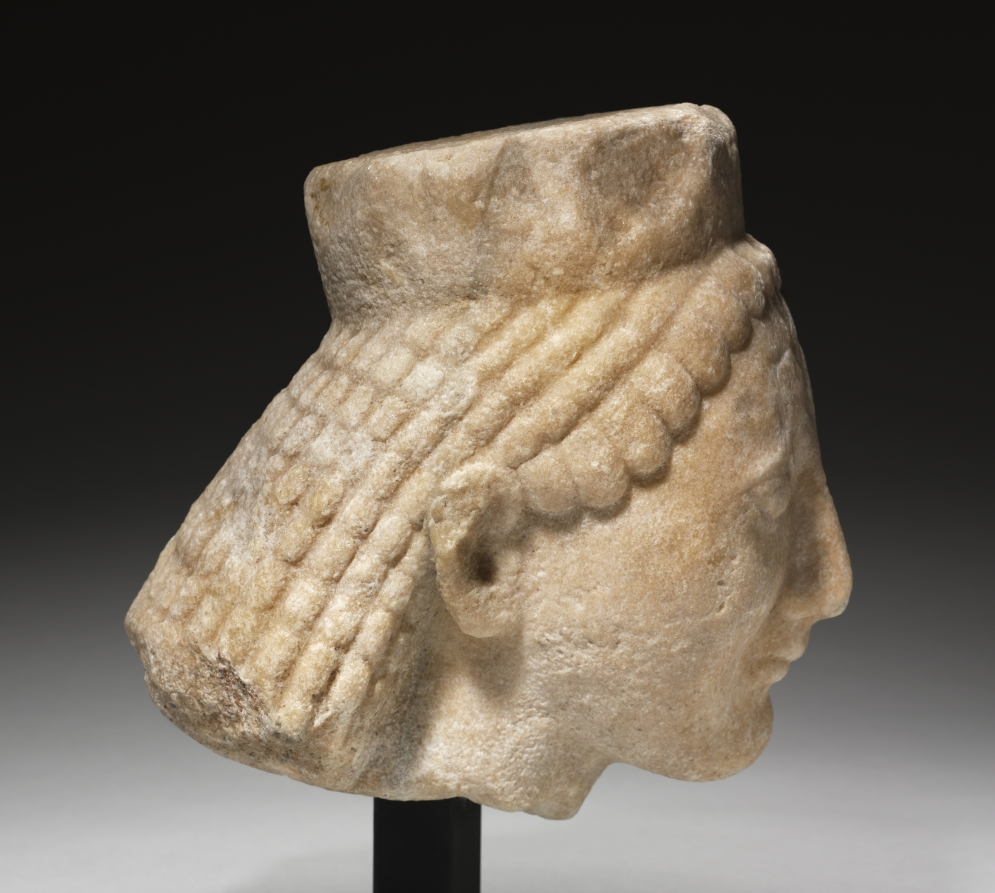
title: Head of a Sphinx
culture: Greece, Archaic period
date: 540–520 BCE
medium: marble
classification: Sculpture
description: This female head once belonged to a sphinx, a mythological hybrid creature with the head of a woman and body of a winged lion. Her short cylindrical crown, known as a polos, helps to identify her as a sphinx, as does the slope of her hair and neck, which once continued onto a feline body. Also common in ancient Egyptian and Near Eastern art (though more often in male form), the sphinx is best known in Greek mythology for devouring passersby who could not answer her riddle outside the Boiotian city of Thebes. Stone sphinxes like this one served as both votive offerings and grave monuments in Archaic Greece.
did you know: Greek sphinxes were often placed on top of columns or grave stelai as guardian figures.